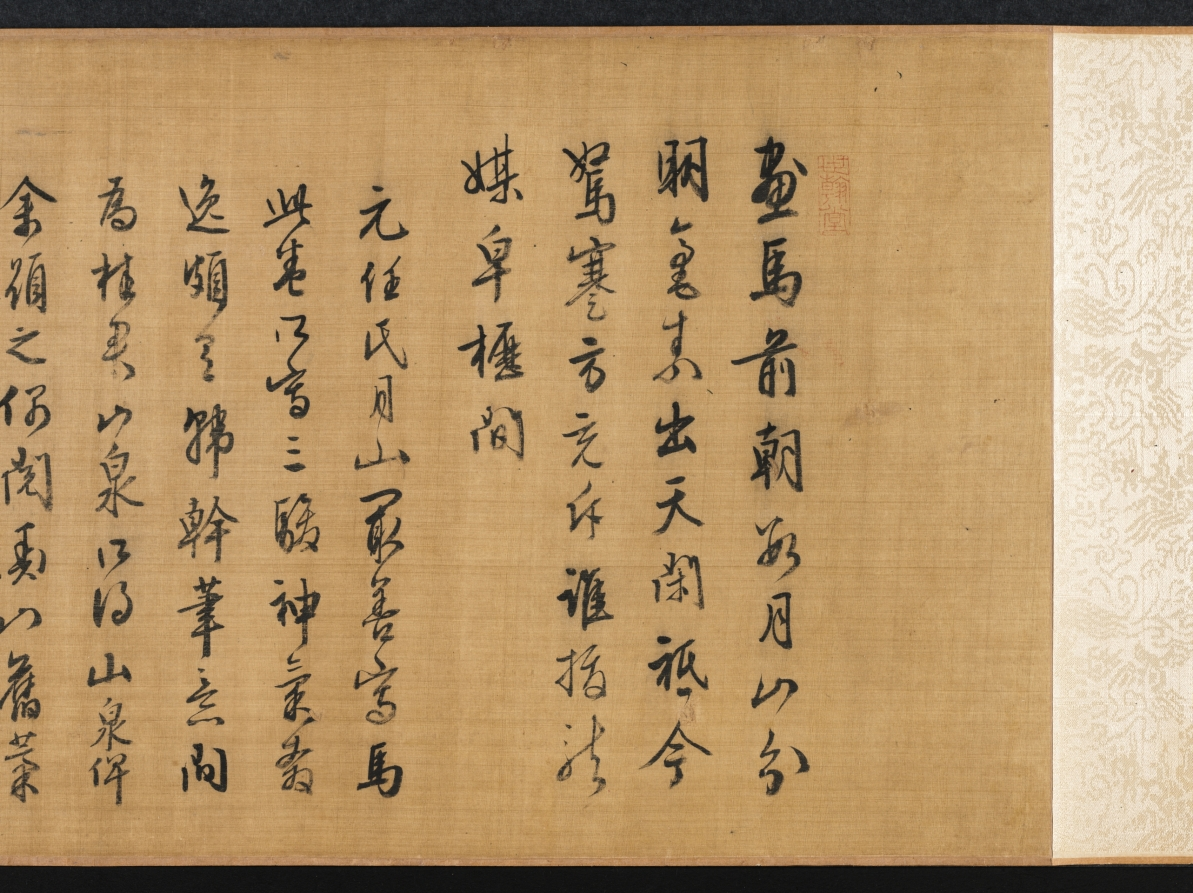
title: Three Horses and Four Grooms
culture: China, Yuan dynasty (1271-1368)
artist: Ren Renfa (Chinese, 1254–1328)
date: c. 1320s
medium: handscroll, ink and color on silk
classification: Painting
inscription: 月山道人. [印] 任氏子明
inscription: 1 colophon and 16 additional seals: 1 poem, 1 colophon dated 1552 or 1612, and 3 seals of Wang Yiying 王一瀛 (1500s); 2 seals of Liang Qingbiao 梁清標 (1620-1691); 6 seals of the Qianlong 乾隆 Emperor (r. 1736-95); 3 seals of the Jiaqing 嘉慶 Emperor (r. 1796-1821); 1 seal of the Xuantong 宣統 Emperor (r. 1908-12); 1 seal of Yu Xiezhong 余協中 (1900s).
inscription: Poem and colophon by Wang Yiying 王一瀛 (1500s): As for painters of horses in the previous dynasty, Surely the name of Yueshan [Ren Renfa] must come first. Under his brush and on his silk, They seem to have just galloped out from the imperial stud. Now as the world overflows with inferiority, Who, from the stable, can recognize a dragon-horse amidst mediocrity. Ren Yueshan [Ren Renfa] of the Yuan Dynasty was best in horse paintings. The three fine steeds he painted in this scroll are so dashing, so vigorous in spirit that they have indeed grasped some of the "brush-idea" of Han Gan. Not long ago this painting came into the possession of Mr. Gui Shanquan, who asked for my inscription. And I, while reading the old manuscripts of Hengshan [Wen Zhengming, 1470-1559], by accident, came cross the poem quoted above. As the ancients said "in painting horses, Master Han was [inspired by and produced] real horses; in composing poems, Master Su [Su Dongpo, the leading Song poet] wrote as if a painting were before him." These are truly what should be considered the two excellences; indeed, they are to be treasured. In the sixth month of the renzi year [either 1552 or 1612]. Jian feng shan ren [The Mountain Dweller of the Sword Peak], Wang Yiying, written in the Qu si ting Pavilion at Chiyang.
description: Ren Renfa's horse images are elegant in appearance and vigorous in spirit. His work attracted not only Chinese scholars but also the Mongols at the imperial court. Inspired by the contemporary scholarly interest in restoring a sense of antiquity in art—an artistic direction led by Zhao Mengfu that exerted a great impact in the Yuan art scene—Ren Renfa, like Zhao Mengfu, modeled his depictions of horses after the Song master Li Gonglin. Another key style component that Ren introduced to this genre was a revival of the Tang classical tradition. The refined color treatment of the horses as seen here was derived from the Tang master Han Gan.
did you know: Only the elegant first horse with a white blaze is accompanied by two grooms, as if its lightning speed required extra supervision.